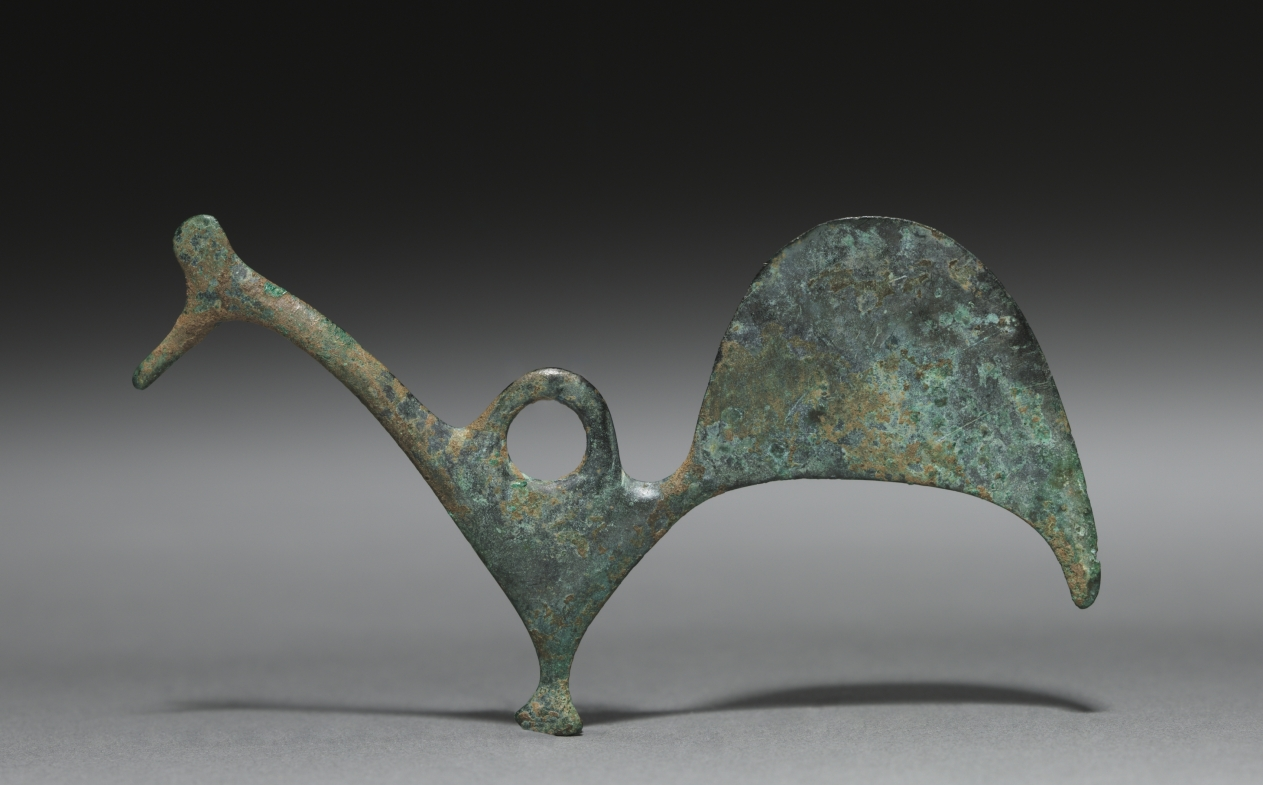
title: Pendant of a Bird (Rooster?)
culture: Northern Greece, Macedonian, Geometric period (900-700 BCE)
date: 700s–600s BCE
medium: bronze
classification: Jewelry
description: Although quite schematic, the subject of this pendant is easily recognizable as a bird, likely a rooster. Cleverly designed to hang evenly from its central suspension loop, it comprises three main parts: long neck terminating in a head with a pointy beak and small crest; triangular body with stylized feet; and broadly arched tail feathers.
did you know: The green patina of this bronze bird pendant is a result of oxidation.